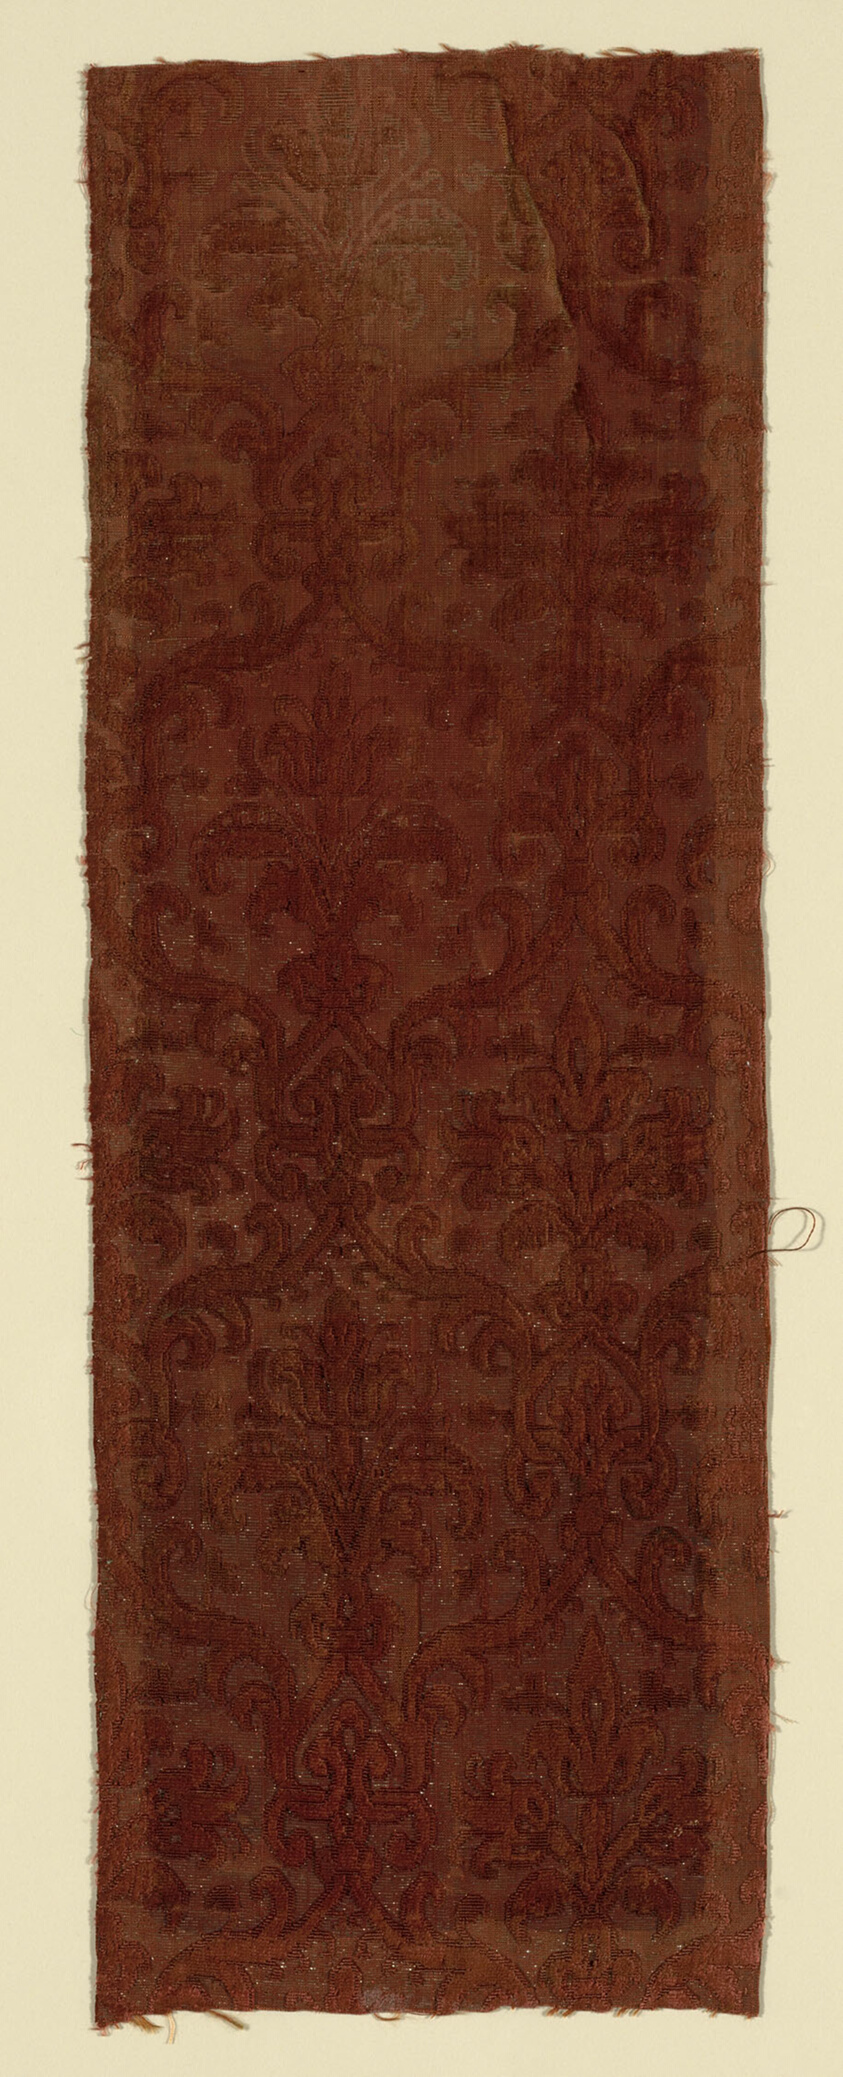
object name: Textile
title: Fragment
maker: Italy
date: c. 1600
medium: Silk, cut, uncut, voided velvet with additional patterning wefts in gold foil against plain weave foundation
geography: Italy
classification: textile; weaving - velvet